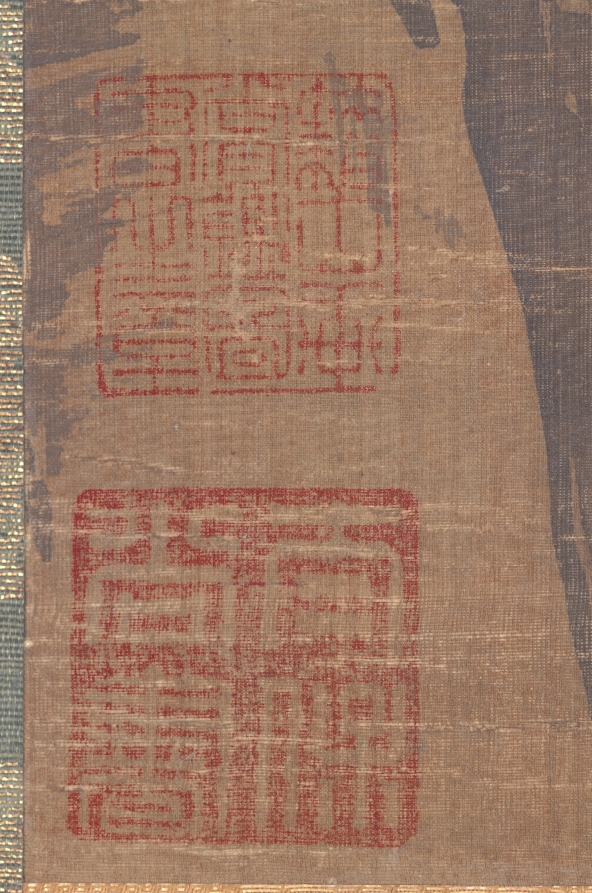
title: The Hermit Xu You Resting by a Stream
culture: China, Ming dynasty (1368–1644)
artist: Dai Jin (Chinese, 1388–1462)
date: 1400s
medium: Hanging scroll; ink and slight color on silk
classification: Painting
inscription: 5 seals: 1 of Huang Lin 黄琳 (active about 1496–1532); 4 unidentified.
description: Xu You, a recluse who refused the throne offered to him by legendary Emperor Yao, chose instead to farm on Mount Ji. Sitting under cliffs, his left arm resting on his risen leg and his loose robe revealing his belly, he displays a nonchalant attitude. Xu You is wearing a laborer’s outfit, a short robe and tight leggings, while his composed pose and gentle features reveal his lofty character. The composition shows rising mountains on the left juxtaposed by open space on the far right. Powerful brushstrokes and nuanced ink washes follow the style of the Southern Song (1127–1279) academy painters.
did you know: When the emperor offered him a post overseeing the Nine Territories (as China was known in ancient times), Xu You went to the River Ying to cleanse his ears from such an unwelcome proposition.